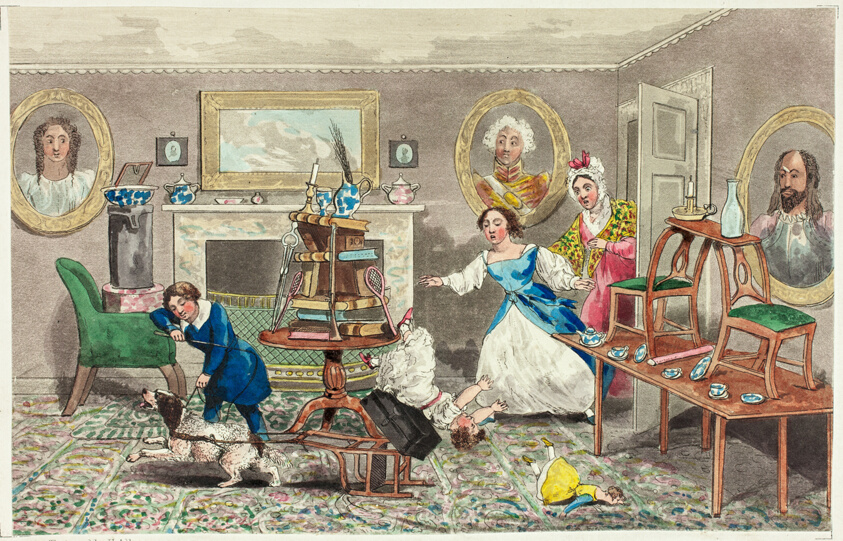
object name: Print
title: First Step to the Coach Box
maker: Henry Alken (English, 1785-1851)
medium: Hand-colored etching on paper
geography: England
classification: etching; print; prints and drawing